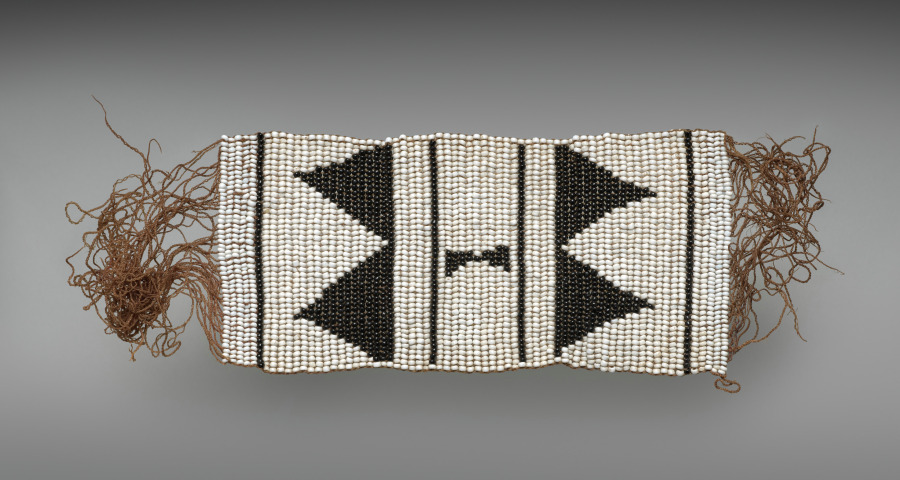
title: Royal ceremonial beadwork: anklet (izitsaba)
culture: Africa, Southern Africa, South Africa, Southeast Cape Region, Unknown female Xhosa-style maker(s)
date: 1800s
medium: Glass beads and sinew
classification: Mixed Media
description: Elite Xhosa women once wore beaded garments like this on festive occasions. Made almost completely from imported Venetian or Bohemian glass beads, they were overt status symbols. Imported beads functioned as money for the Xhosa between circa 1770 and 1829. These garments’ female maker carefully selected beads of the highest quality, uniform in color, shape, and size.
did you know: The beads to make an ensemble like this cost several cattle in the early 1800s, an amount most couldn't afford.